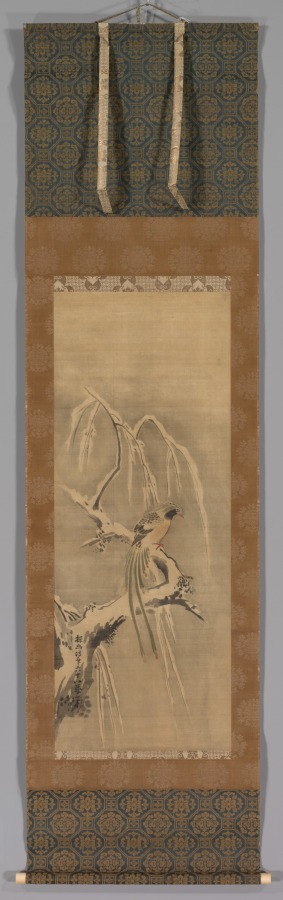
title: Chinese Bird on Snow-Laden Branch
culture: Japan, Edo period (1615–1868)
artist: Kano Tan’yū (Japanese, 1602–1674)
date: 1661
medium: One of a triptych of hanging scrolls; ink and slight color on silk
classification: Painting